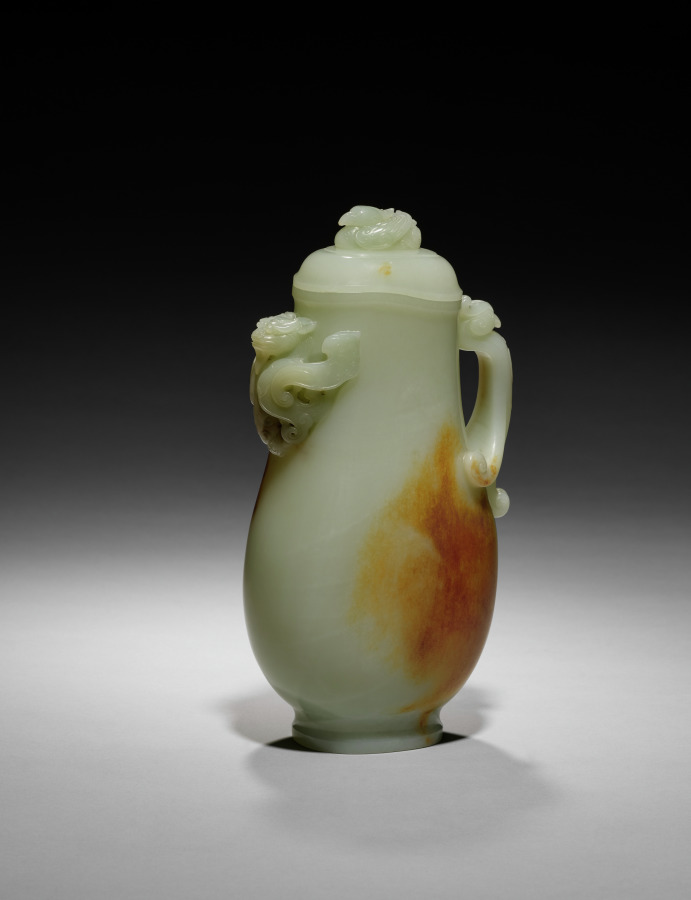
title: Pitcher (Gong) with Dragon and Bird-Headed Handle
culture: China, Qing dynasty (1644–1911)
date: 1700s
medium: pale greenish-white jade with brown markings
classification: Jade